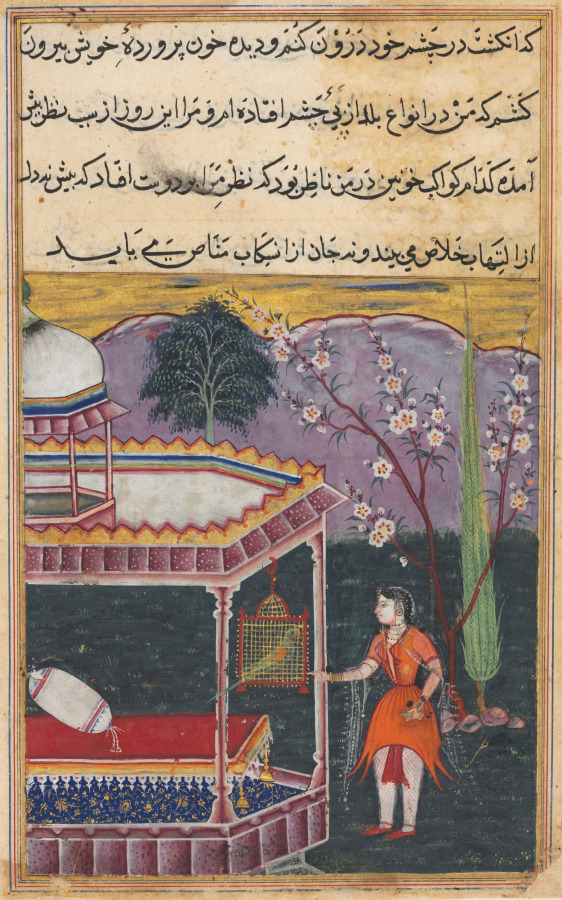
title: The Parrot Addresses Khujasta at the Beginning of the Eighth Night, from a Tuti-nama (Tales of a Parrot)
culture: Mughal India, court of Akbar (reigned 1556–1605)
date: c. 1560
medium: gum tempera, ink, and gold on paper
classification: Painting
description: On the eighth night, the parrot tells Khujasta a story—the most lavishly illustrated of all the chapters in the book—that has important parallels with the experiences of Emperor Akbar himself. The overarching tale is about a prince who maintained a vow of silence despite being imprisoned and taken to be executed on seven consecutive days. Each day, the king was convinced to stop the execution after hearing a story told by one of his seven viziers, or ministers. The adjacent paintings illustrate scenes from the overarching tale as well as the fifth vizier's story. The golden sky, purple hills, cyprus tree, and flowering branches are elements learned from Persian painting. Indian sources contributed the bolster that appears to float on the suggestively red-colored plane of the bed.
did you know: Banavari 1 also painted folios 49v (1962.279.49.b), 50v (1962.279.50.b), and 52v (1962.279.52.b).